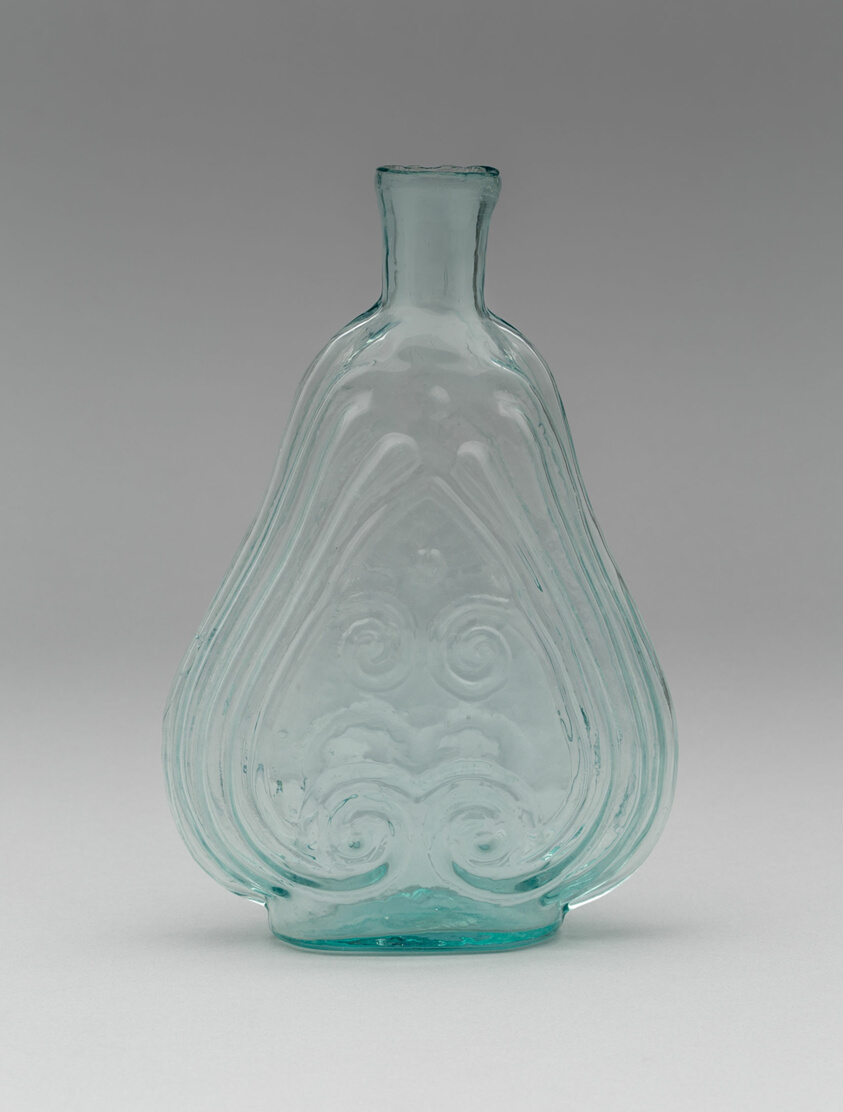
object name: Glass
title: Flask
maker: Artist unknown (American, 19th century)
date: 1840–60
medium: Glass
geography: United States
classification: flask (bottle); glass; american decorative arts; american arts; decorative arts